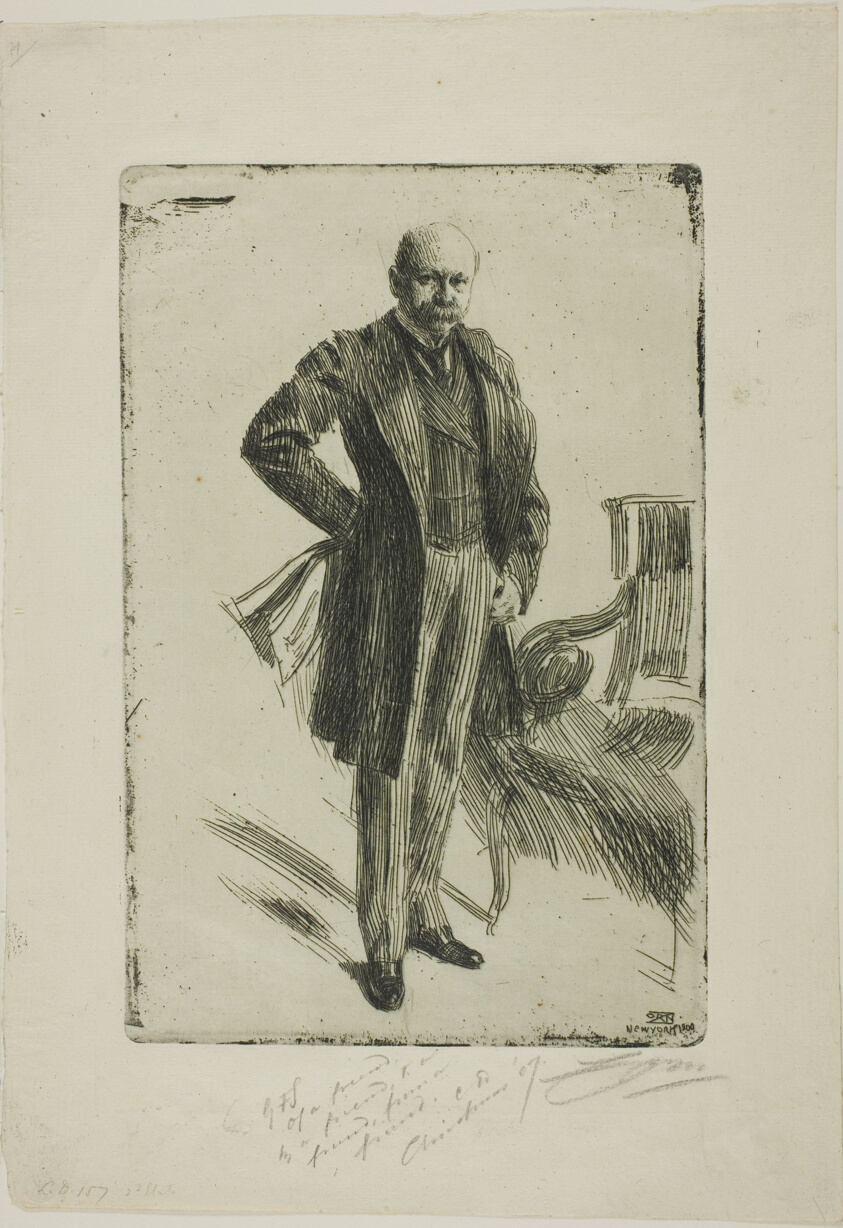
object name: Print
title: Colonel Lamont I (Whole length)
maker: Anders Zorn (Swedish, 1860-1920)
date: 1900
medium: Etching on ivory laid paper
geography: Sweden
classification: etching; print; prints and drawing